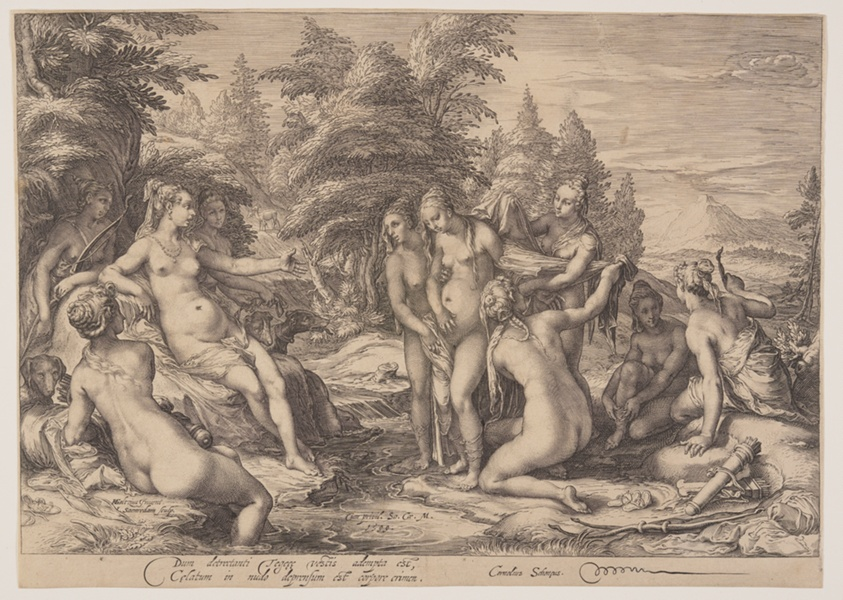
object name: Print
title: Diana and Callisto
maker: Jan Saenredam (Dutch, 1565–1607); after Hendrick Goltzius (Dutch, 1558-1617)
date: 1599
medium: Engraving on ivory laid paper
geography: Netherlands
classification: print; paper; prints and drawing; engraving